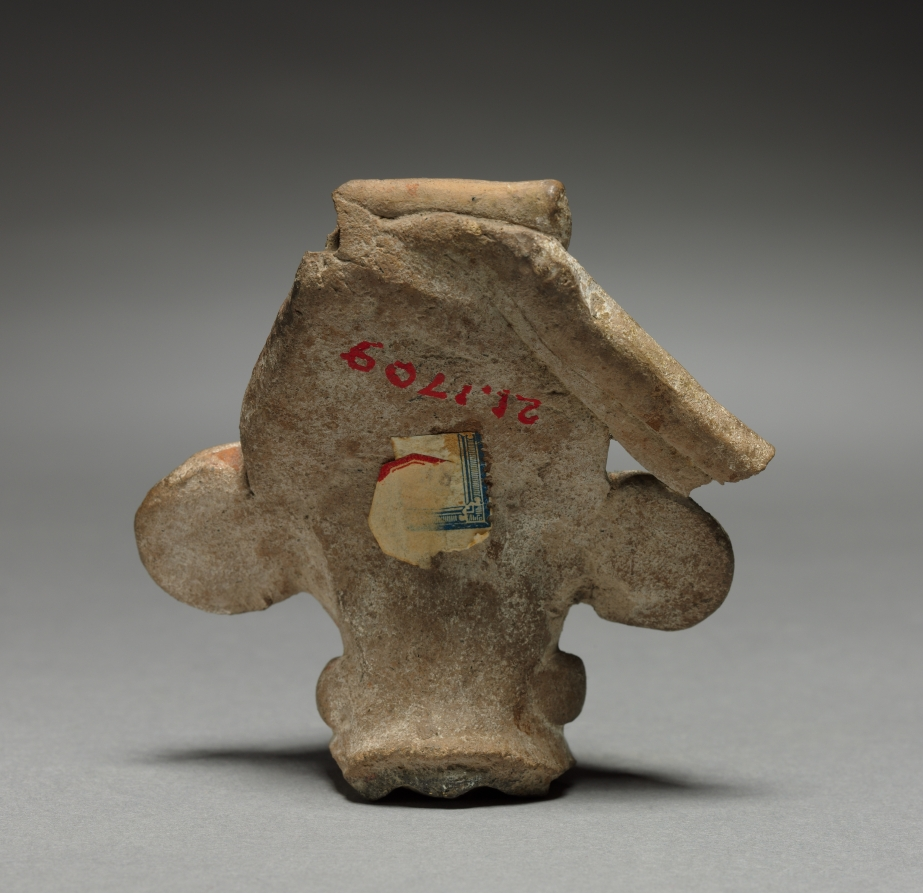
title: Figurine Head Fragment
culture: Central Mexico, Teotihuacán, Classic period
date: 150–350 CE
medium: ceramic, pigment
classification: Ceramic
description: The earliest Teotihuacan figurines are hand modeled, while later specimens were produced with molds. This exceptionally large example has a mold-made head, with facial features carefully retouched by hand. Earthenware figurines were made in great abundance throughout Teotihuacan's history, and may have been used in household religious rituals.